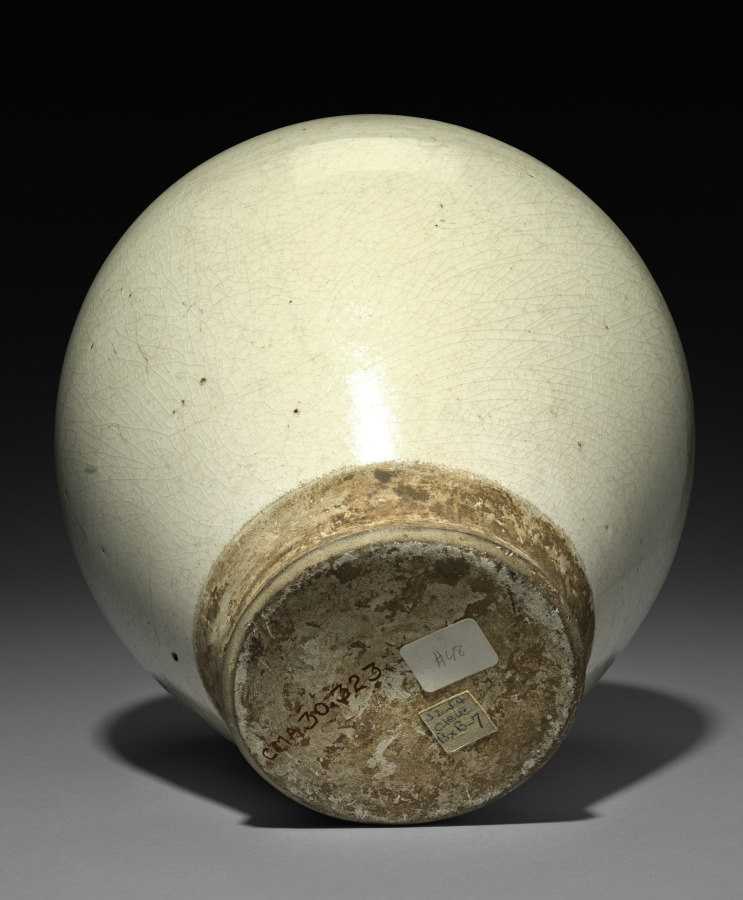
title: Jar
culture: China, Tang dynasty (618-907)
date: mid-600s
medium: glazed stoneware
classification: Ceramic